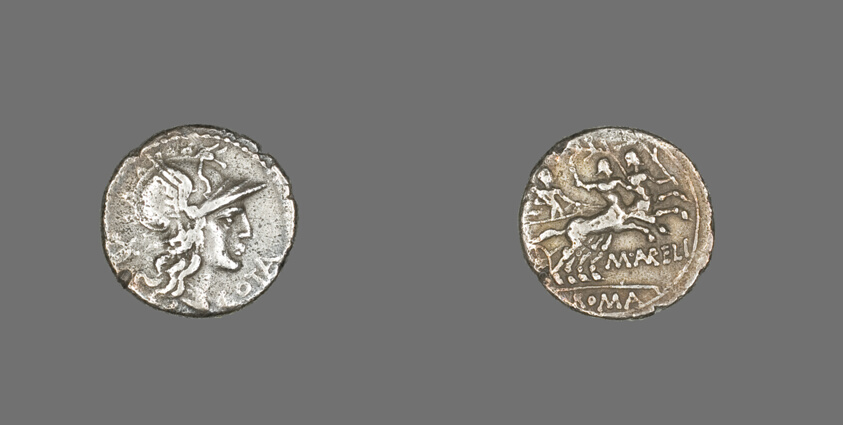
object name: Coin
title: Denarius (Coin) Depicting the Goddess Roma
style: roman (ancient, style or period), ancient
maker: Roman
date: 139 BCE, issued by the Aurelia family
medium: Silver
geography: Roman Empire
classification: coin; ancient art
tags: Chariots